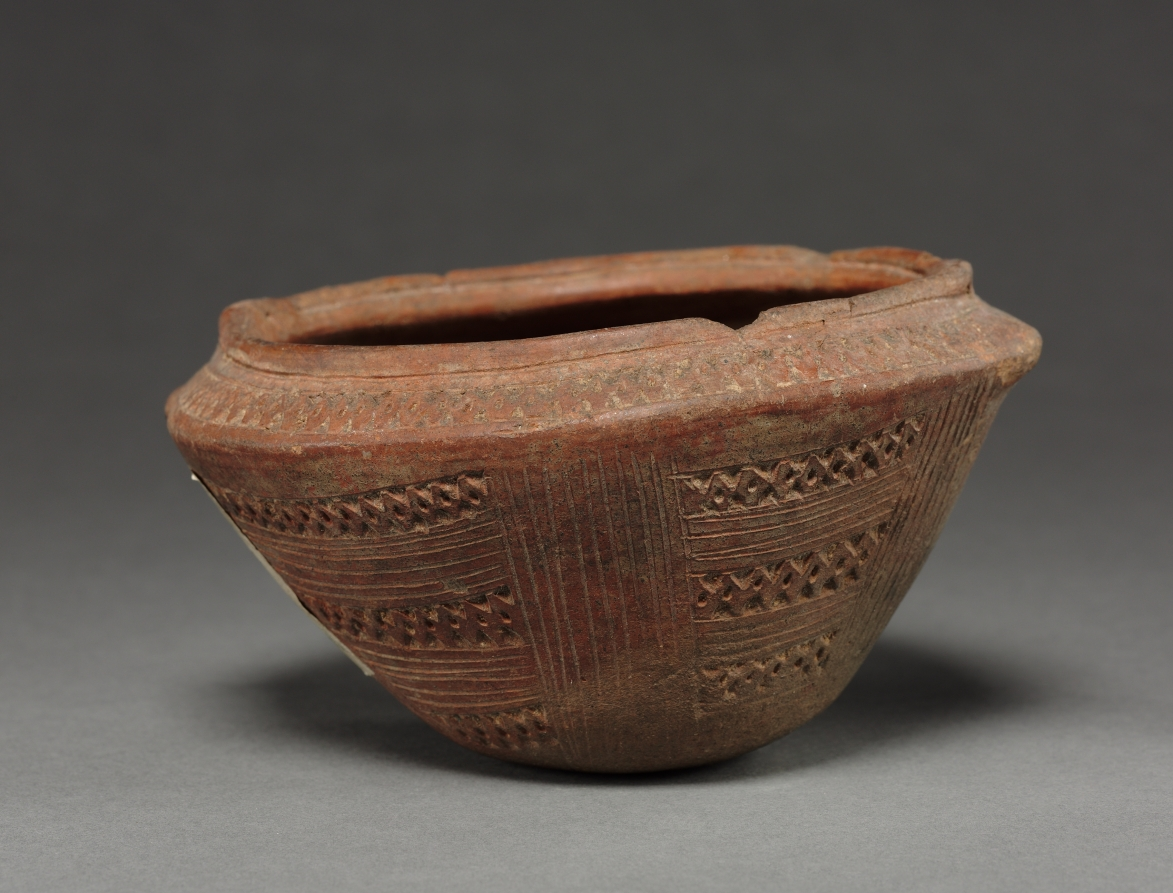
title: Jar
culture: Colombia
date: before 1550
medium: red ware with incised patterns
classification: Ceramic